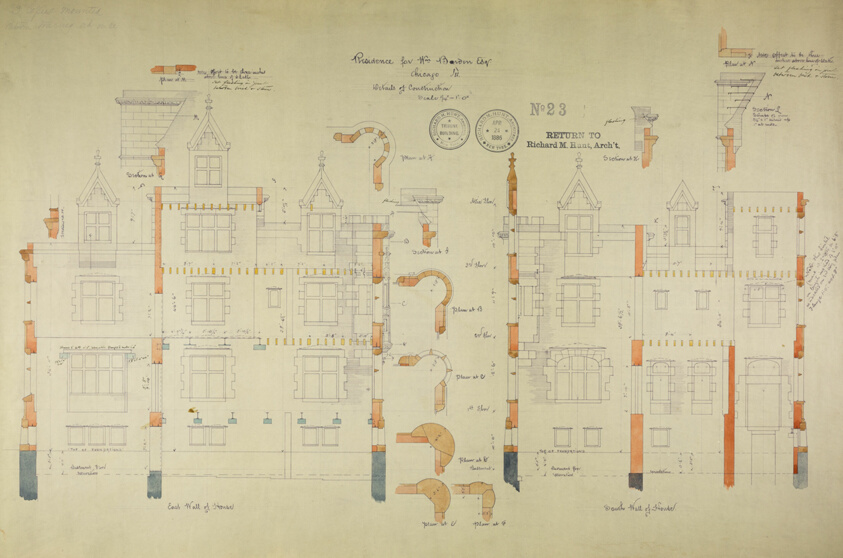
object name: Architectural Drawing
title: William Borden Residence, Chicago, Illinois, Construction Details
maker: Richard Morris Hunt (American, 1827-1895)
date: 1885/86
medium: Watercolor on hectographic print, mounted on linen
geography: Chicago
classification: working drawing; architectural drawing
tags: Chicago